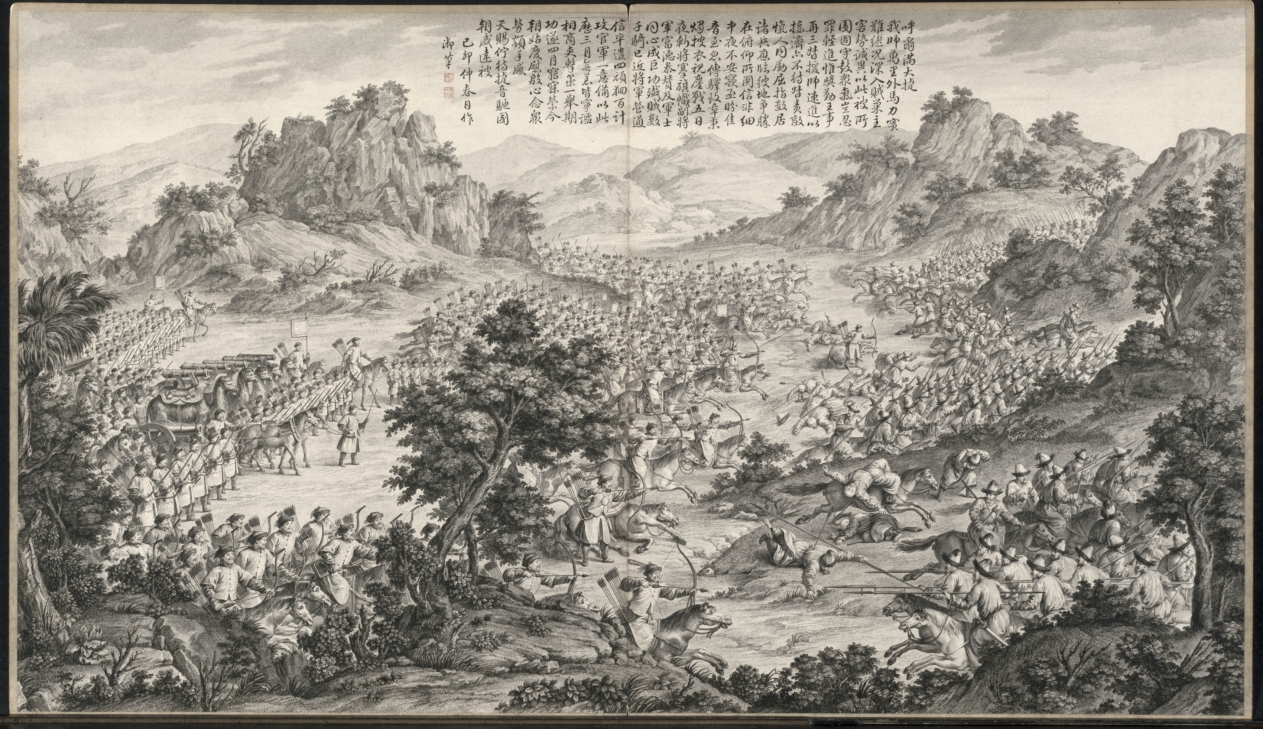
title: Great Victory at Hu'erman: from Battle Scenes of the Quelling of Rebellions in the Western Regions, with Imperial Poems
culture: China, Qing dynasty (1644–1911), Qianlong reign (1736–95)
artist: Jean Damascene Sallusti (Italian, d. 1781)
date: c. 1765–74; poem dated 1759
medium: etching, mounted in album form, 16 leaves plus two additional leaves of inscriptions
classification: Print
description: This set of etchings was commissioned by Emperor Qianlong to record in pictorial terms the courage of his generals and soldiers in quelling the rebellions in the Western Regions. Qianlong added his own poem to each of the etchings, indicating his appreciation and pride in this demonstration of military might. "Western Regions" refers to the present-day Xingjiang province, often described in Western writing as "Central Asia."